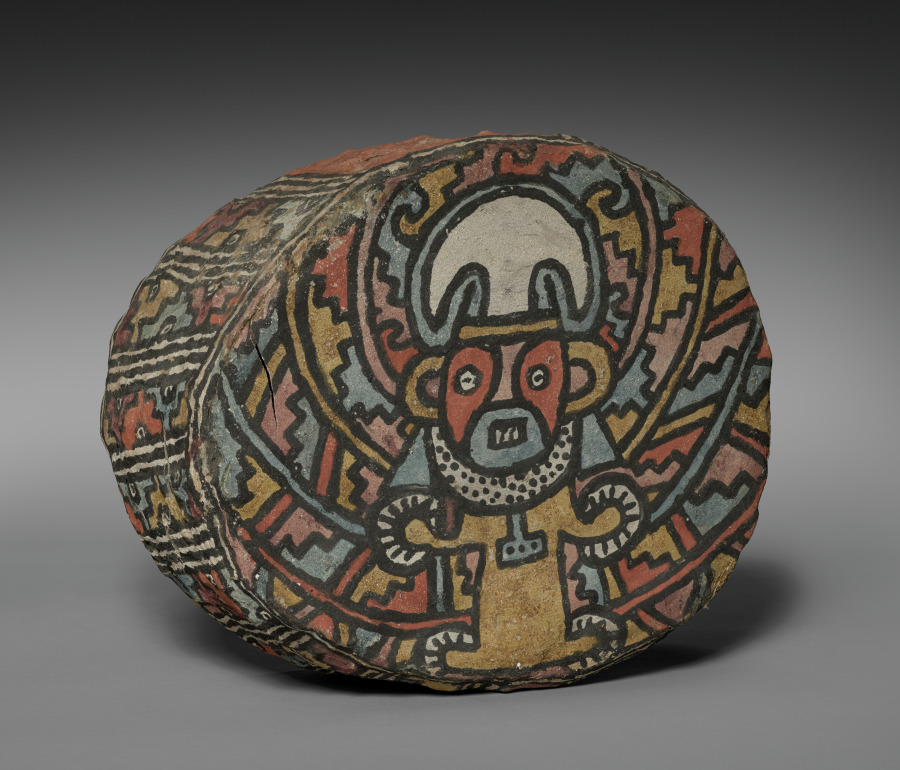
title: Painted Drum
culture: Central Andes, Middle Horizon, North Coast?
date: 500–1000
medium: Animal hide, gesso, wooden slats, pigment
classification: Musical Instrument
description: In the 1600s, music was so important to Indigenous Andean ceremonial life that Spaniards destroyed thousands of musical instruments to hasten Natives’ conversion to Christianity. The number of surviving, older instruments suggests that music had similar import in earlier periods. This rare example is painted with a figure wearing a crescent headdress, an emblem of status; it may have been played by a woman.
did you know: This painted drum may have been played by a woman in antiquity.